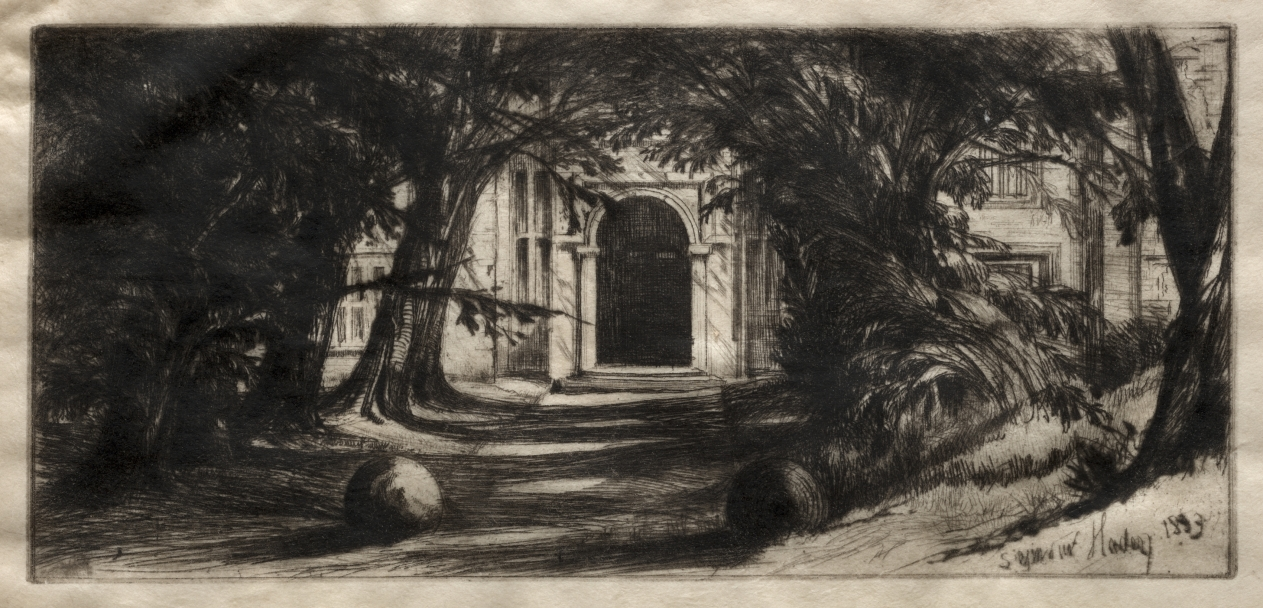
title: Mytton Hall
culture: England, 19th century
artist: Francis Seymour Haden (British, 1818–1910)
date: 1859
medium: drypoint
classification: Print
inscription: lower right, in graphite: Seymour Haden (faded)